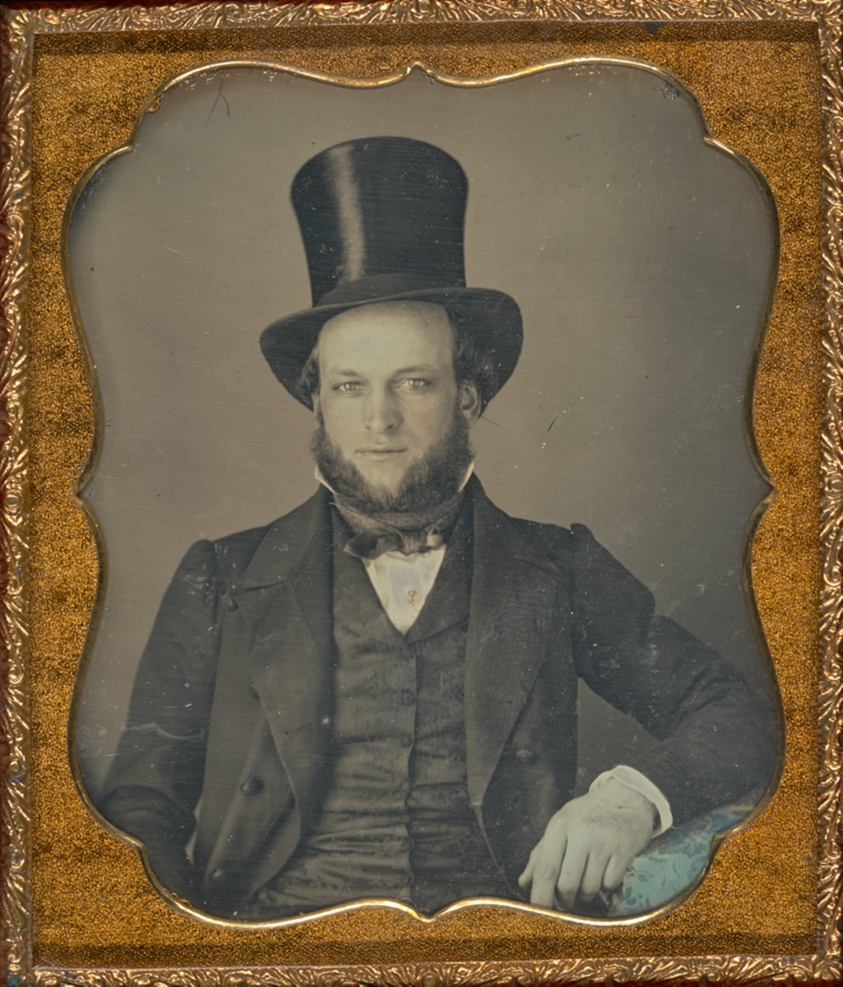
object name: Photograph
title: Untitled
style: 19th century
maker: Artist unknown; American, 19th century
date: 1839/60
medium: Daguerreotype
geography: United States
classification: daguerreotype; photographic process; photography; photograph